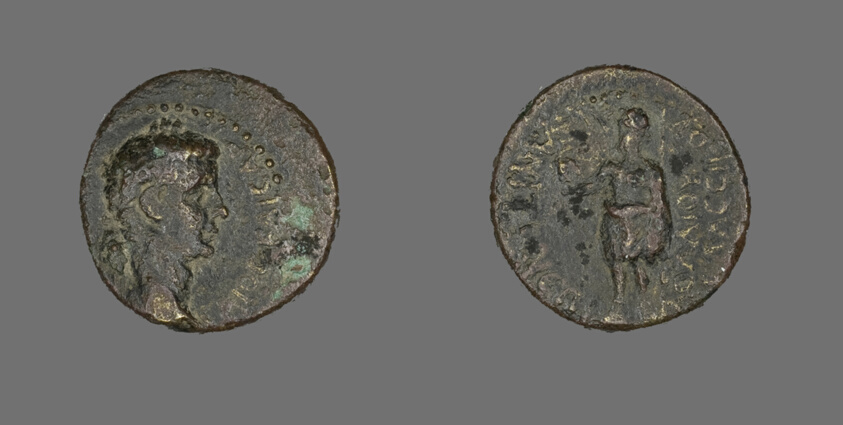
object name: Coin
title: Coin Portraying Emperor Caligula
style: roman (ancient, style or period)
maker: Roman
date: 37-41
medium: Bronze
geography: Roman Empire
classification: coin; ancient art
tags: portrait